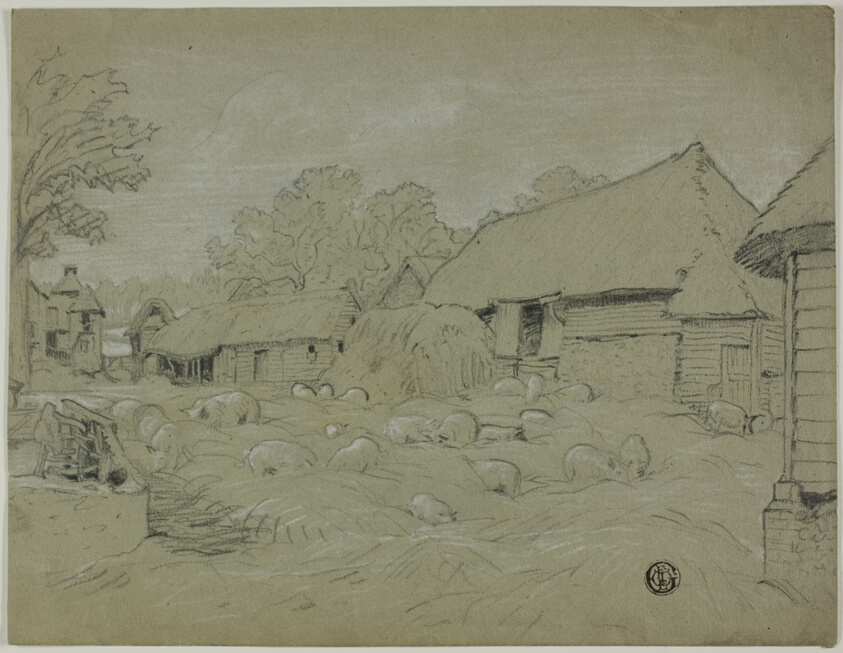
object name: Drawing and Watercolor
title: Farmyard with Haystack and Pigs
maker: Style of William Turner (English, 1789-1862)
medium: Black crayon, heightened with white chalk, on green wove paper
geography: England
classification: chalk; drawings (visual works); prints and drawing